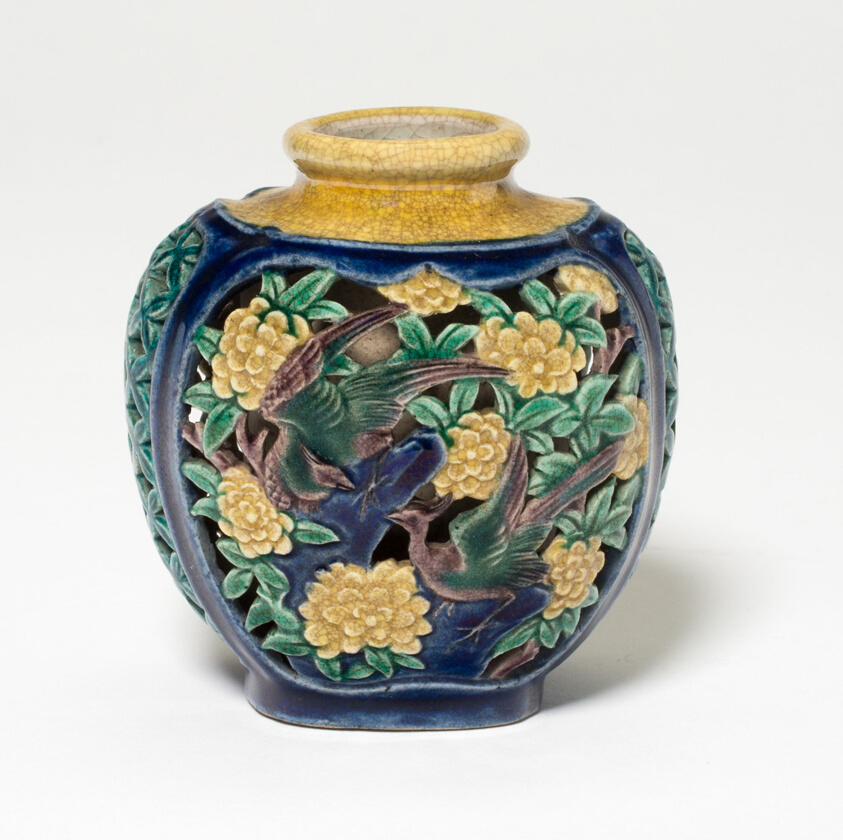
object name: Vessel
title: Miniature Openwork Bottle with Birds and Peonies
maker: China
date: Qing dynasty (1644–1911), 18th century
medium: Porcelain painted in overglaze enamels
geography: China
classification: porcelain; asian art; ceramics; vessel